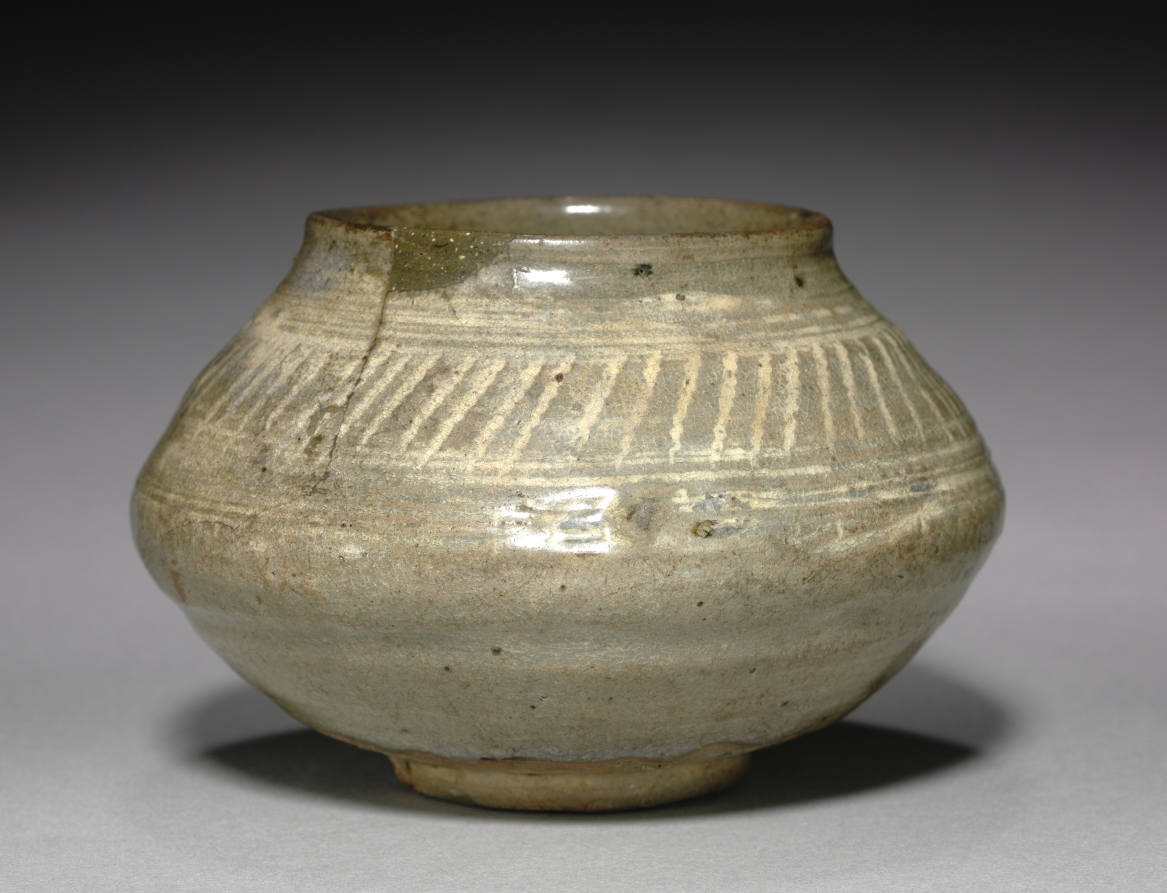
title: Jar with Stamped Decoration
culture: Korea, Joseon dynasty (1392–1910)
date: 1400s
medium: stoneware with incised design, white slip, and overglaze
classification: Ceramic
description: This small jar may have been used as a container for powdered tea among Japanese tea drinkers. Possibly produced in one of the kilns established by the trading office (Waegwan) in Busan, southern Gyeongsang province, it was sold to Japanese tea bowl collectors. According to a historical record dated to 1641, one trading boat shipped more than 14,000 tea bowls to Japan.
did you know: This little jar was part of the gift donated by John L. Severance (1863–1936). He and his father Louis H. Severance (1838–1913) collected Korean ceramics of the Goryeo dynasty (918–1392) from a number of pioneering medical missionaries as a way to foster their activities in Korea, and later donated them to the Cleveland Museum of Art.